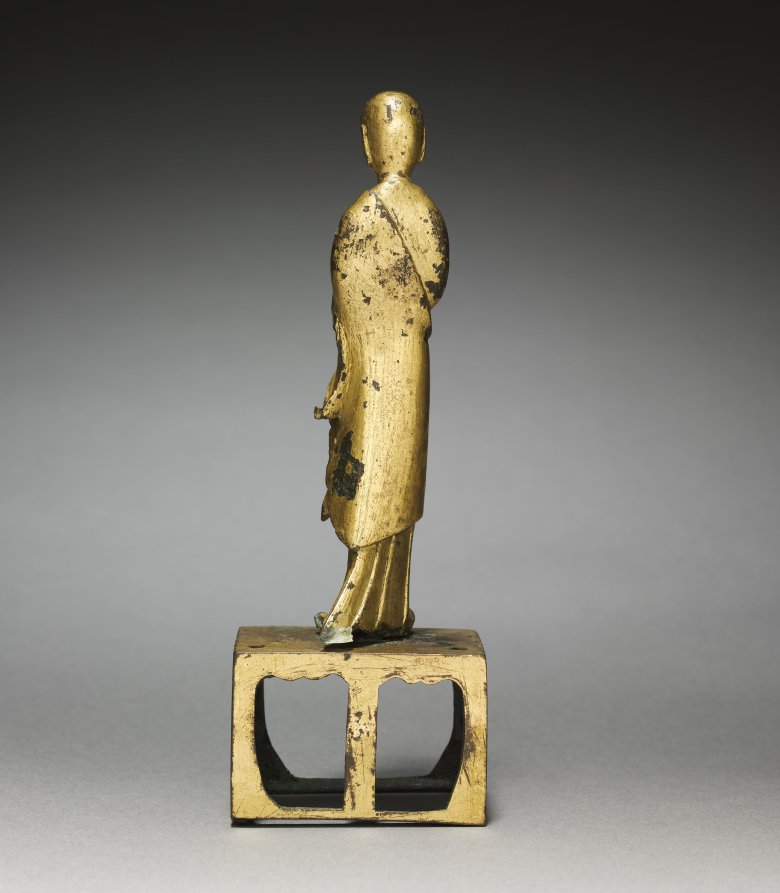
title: Adoring Monk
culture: China, Northern Wei dynasty (386-534)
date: early 500s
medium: gilt bronze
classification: Sculpture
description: Portable Buddhist figures and objects like this gilt bronze had a variety of uses. They could have been carried in religious processions. Others could serve as donations, souvenirs, or votive items in the context of pilgrimages to religious sites. Their miniature size also made them appropriate for placement on private altars or shrines for personal devotion.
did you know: The monk stands with his hands together in a reverent greeting.